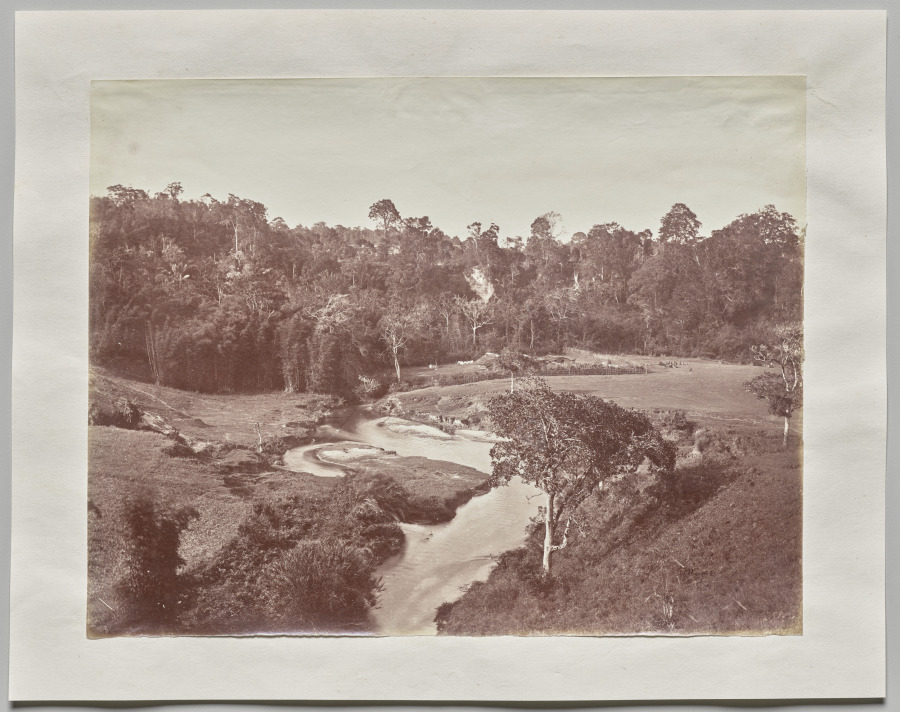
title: Untitled (River, Hong Kong or Macau, China)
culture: England, 19th century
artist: William Pryor Floyd (British, 1834–c. 1900)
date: 1866–73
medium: albumen print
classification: Photograph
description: A young art form, photography had not yet fully developed its own visual traditions when William Pryor Floyd was working, so he often borrowed compositional formats from classical landscape painting. Here, he instead daringly placed the stream right in the middle of this composition. It wends its way in gentle S curves into the distance, drawing the viewer’s eye up and across the picture plane, until it disappears into distant trees.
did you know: A photographer’s choice of viewpoint and framing can radically change how we see a landscape.